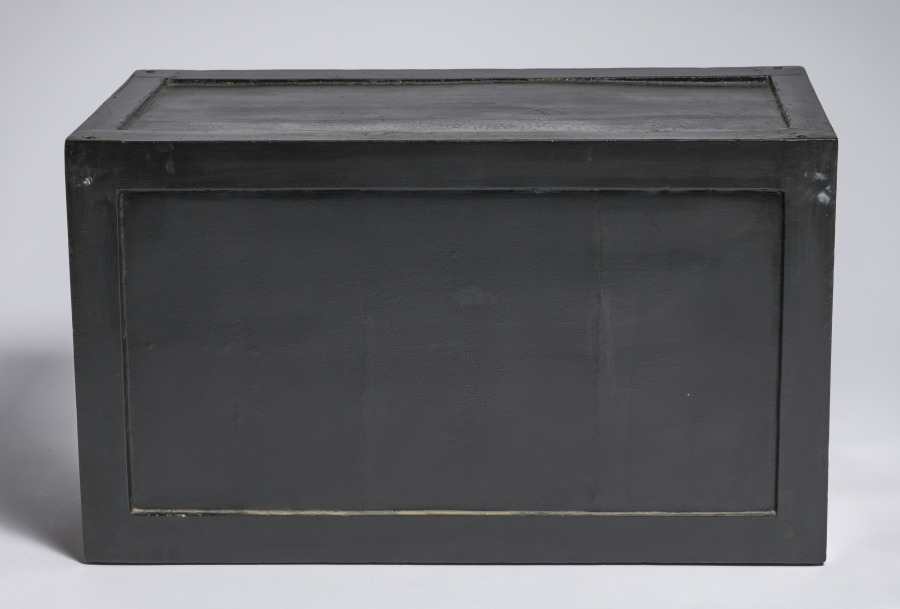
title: Top Chest of a Double Cabinet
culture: China, Ming dynasty (1368-1644) - Qing dynasty (1644-1911)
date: 1600s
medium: red lacquer on wood with pigment and gilding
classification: Furniture and woodwork